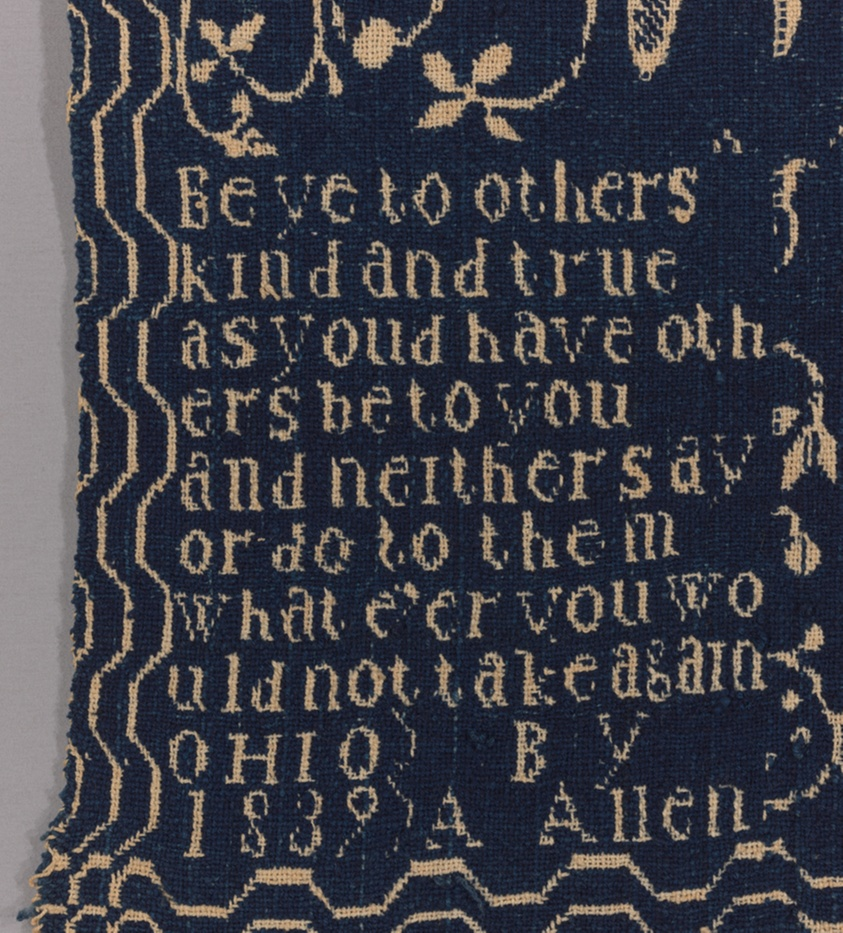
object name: Textile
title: Coverlet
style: 19th century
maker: Abram Allen (American, born Irish, c. 1796- after 1860); United States, Ohio, Clinton County, Wilmington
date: 1839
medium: Cotton and wool, plain weave double cloth with main warp fringe; woven on loom with Jacquard attachment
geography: Ohio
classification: textile; coverlet; weaving - coverlet; weaving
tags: flowers, words, vines, primrose, fruit, friendship, foliage, birds, bird, coverlet